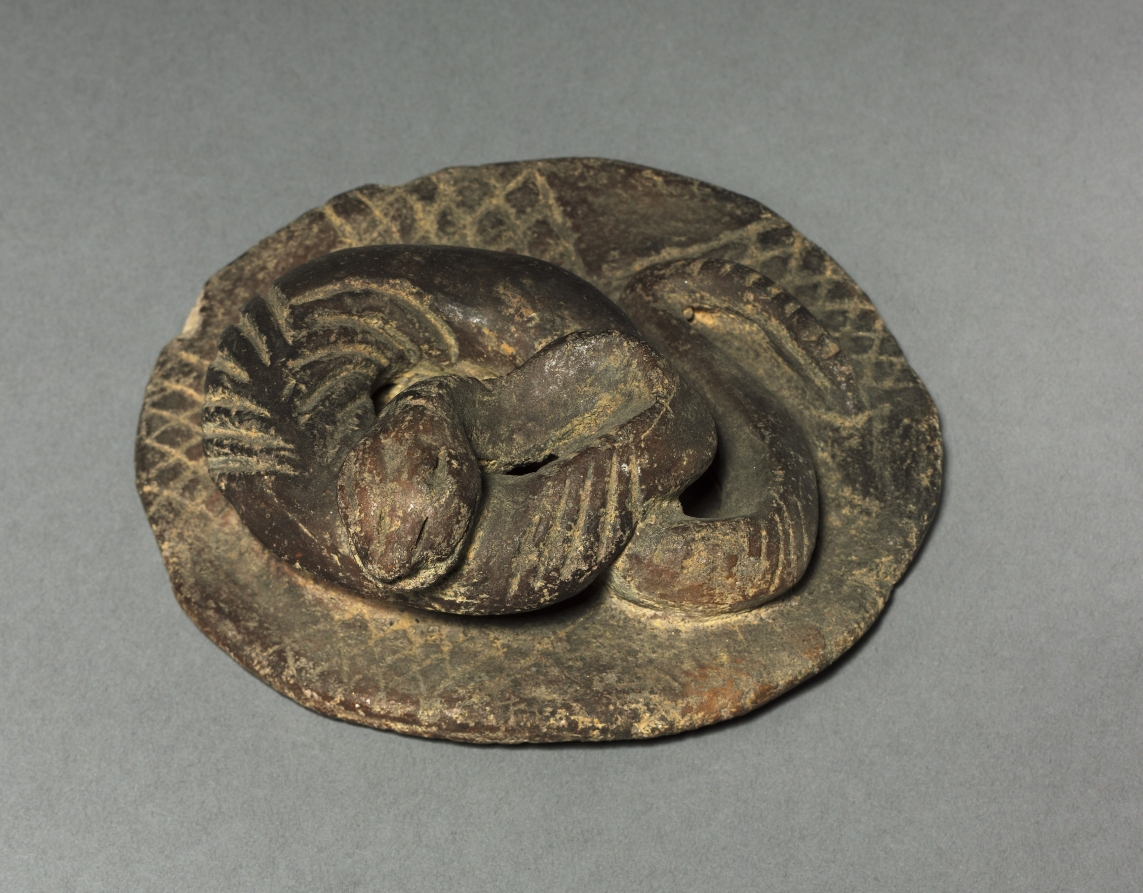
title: Weight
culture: Colombia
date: before 1921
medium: pottery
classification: Ceramic